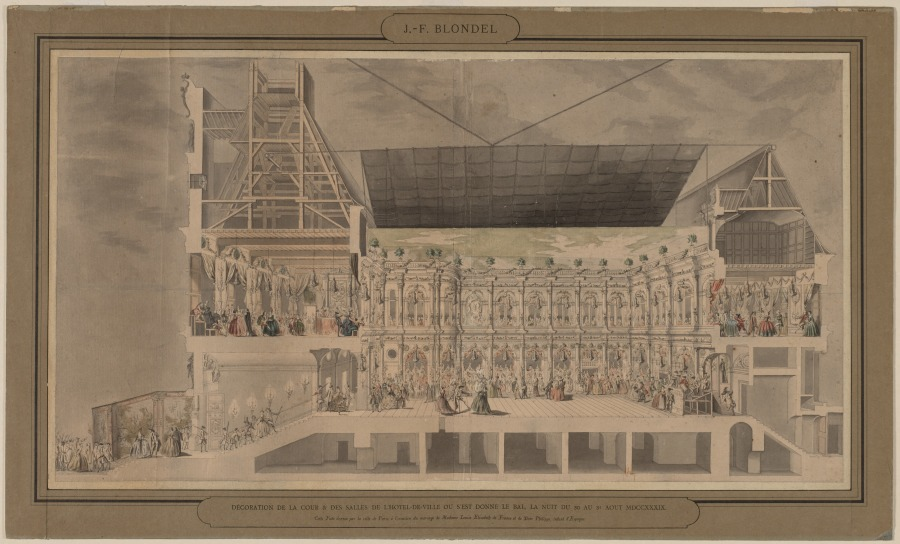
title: Cross Section of the Hôtel de Ville Seen in Perspective Showing the Decoration and Illumination of the Courtyard and Rooms Created on the Occasion of the Ball Given the Night of August 30 and 31, 1739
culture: France, 18th century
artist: Jacques-François Blondel (French, 1705–1744)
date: 1739–1740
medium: pen and black ink, brush and gray wash, and watercolor with gouache, over graphite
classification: Drawing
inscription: upper center in black: J. F. BLONDEL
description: This cross-section of a building allows a unique view into a French royal wedding. The partiers are dressed in costume and dance in the Parisian town hall. No expense was spared in the lavish celebration, from flowers to drinks to the elaborate false ceiling painted to look like the sky.